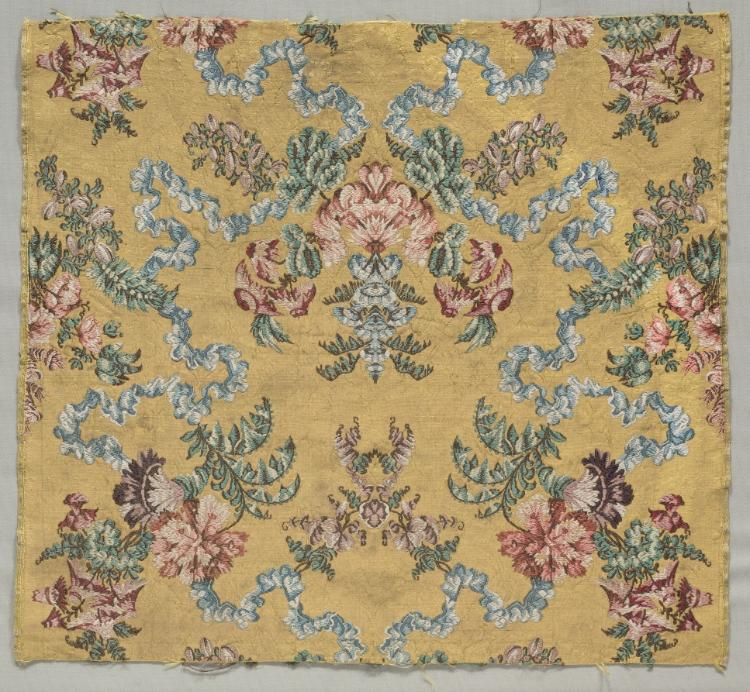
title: Length of Brocaded Silk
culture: France, 18th century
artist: style of Jean Baptiste Pillement (French, 1728–1808)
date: 1723–1774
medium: brocade on tabby; silk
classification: Textile